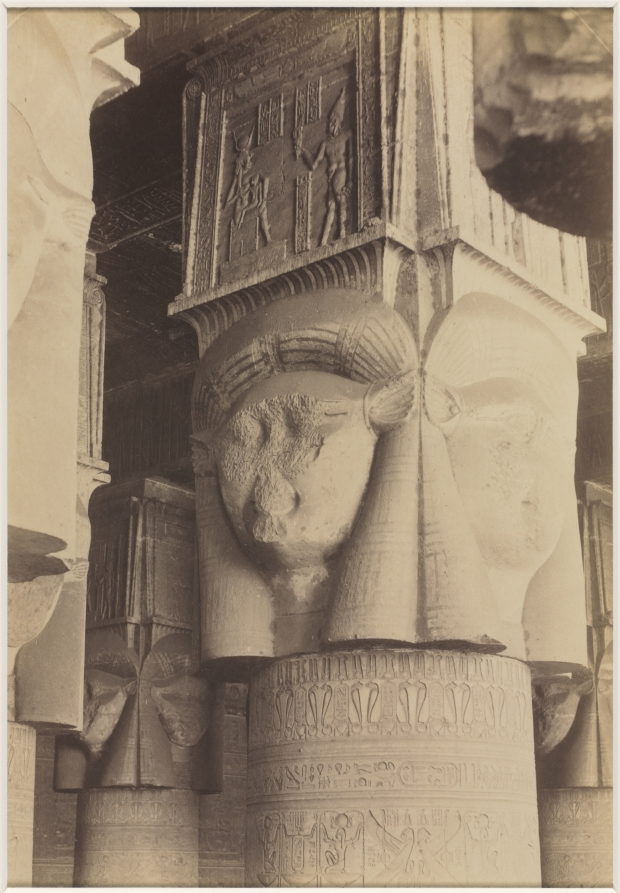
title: Dendera, Interior of the Temple, Hathor Capitals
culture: England, 19th century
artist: Antonio Beato (British, c. 1825–1903)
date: c. 1870s - 1880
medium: albumen print from wet collodion negative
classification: Photograph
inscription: Written in pencil on verso: "342 Denderah/Intérieur du temple/chapiteaux hathoriques"; "AB-5296-Z"